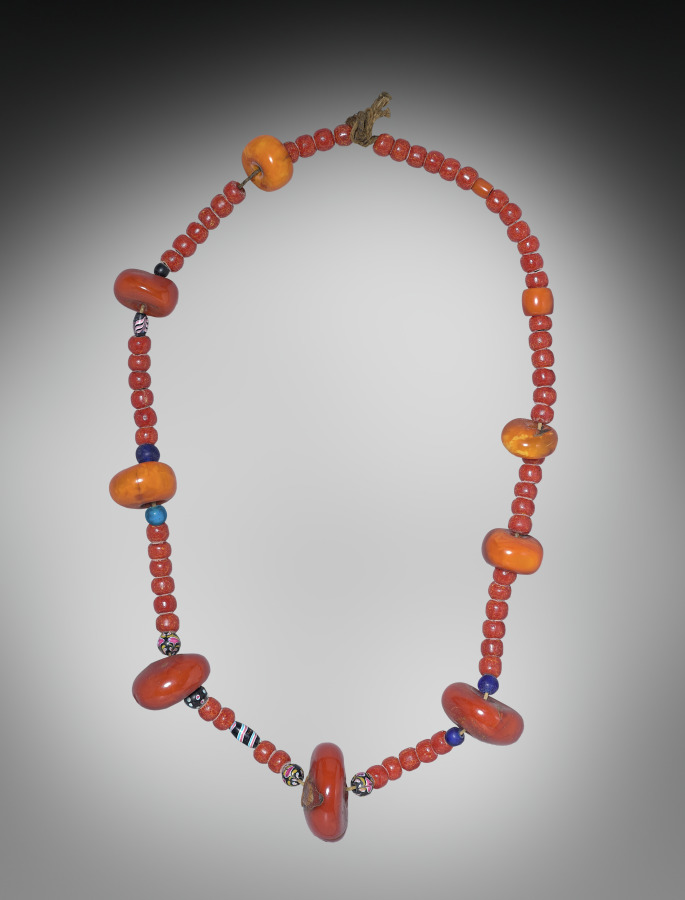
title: Necklace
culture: Tibet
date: c. 1900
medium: amber, bone and glass beads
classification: Jewelry